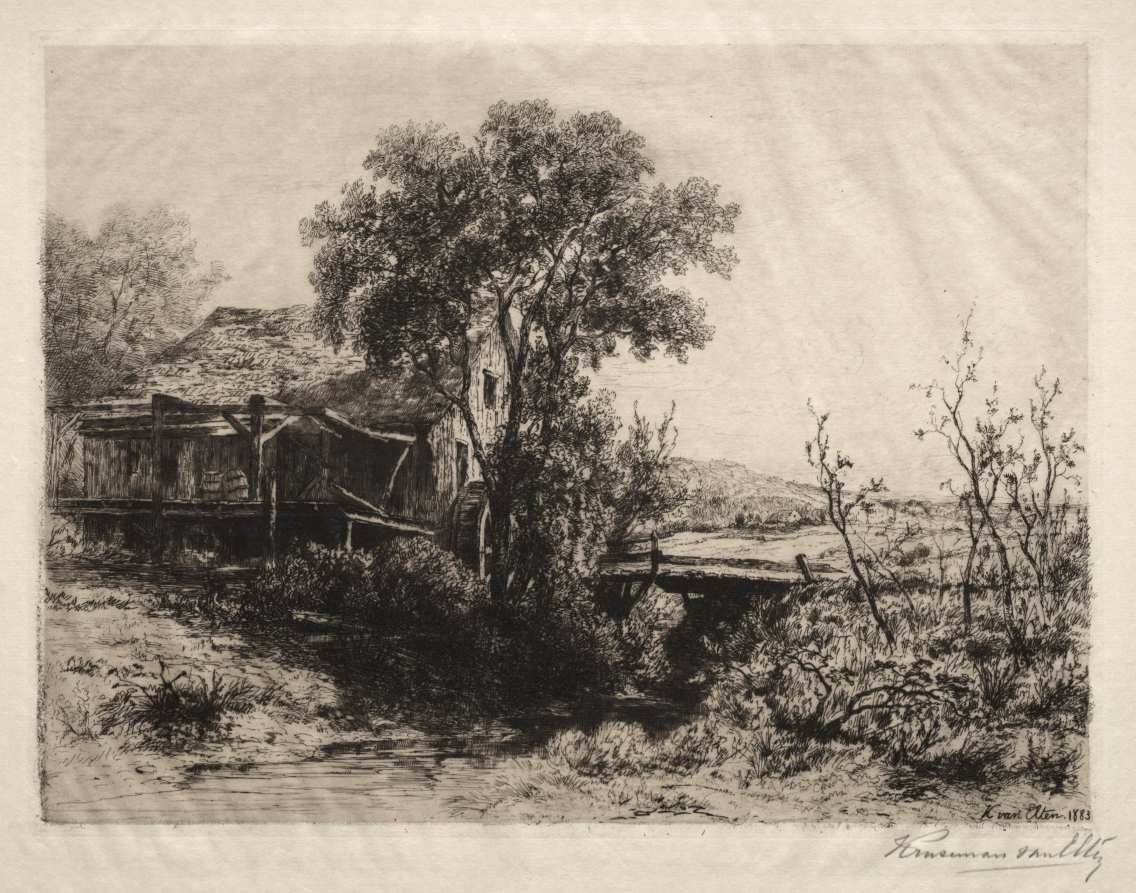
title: The Deserted Mill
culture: America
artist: Hendrik Dirk Kruseman van Elten (American, born The Netherlands, 1829–1904)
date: 1883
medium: etching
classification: Print